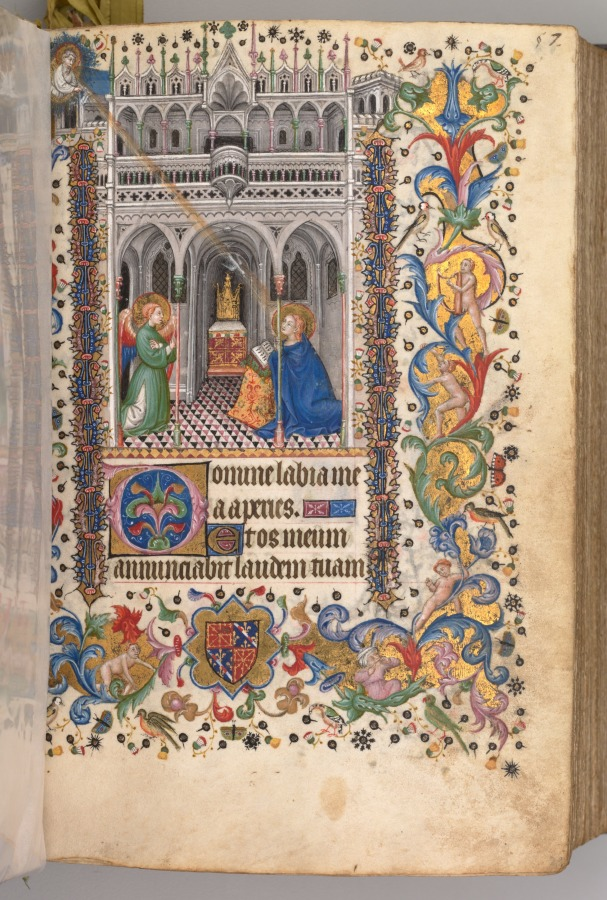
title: Hours of Charles the Noble, King of Navarre (1361-1425): fol. 29r,The Annunciation (Matins)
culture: France, Paris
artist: Master of the Brussels Initials and Associates (French)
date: c. 1405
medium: ink, tempera, and gold on vellum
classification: Bound Volume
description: This precious volume was obviously highly prized by its owner, the French-born King of Navarre, who had his coat of arms painted on no less than 20 folios. Rather than directly commissioning this manuscript from a specific workshop, it seems that Charles the Noble acquired his book of hours—perhaps made for the luxury market—while on a trip to Paris in 1404–5. A collaborative effort, six painting styles are seen within the pages of this codex, those of two Italians, two Frenchmen, and two Netherlanders. The painter who was responsible for the planning and decoration of the book, and who produced 17 of the large miniatures, was a Bolognese artist known as the Master of the Brussels Initials.